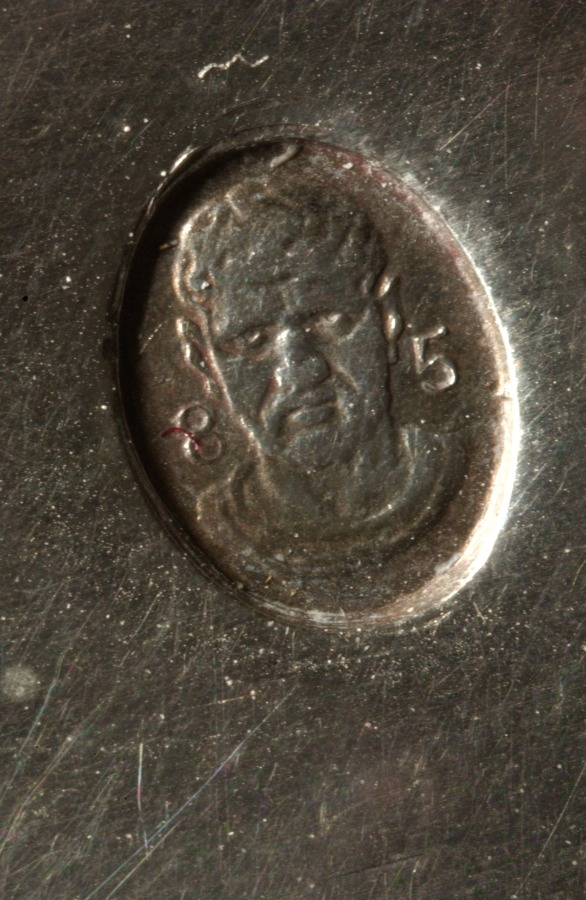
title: Covered Tureen on Stand (Pot à oille)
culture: France, late 18th-early 19th Century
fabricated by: Henry Auguste (French, 1759–1816)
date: 1797–98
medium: silver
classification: Silver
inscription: [Coat-of-arms of Amoral don Federico Carlos Gravina on bowl; cover; stand]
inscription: [Assay mark for large-sized work, 1798-1809, lining exterior; tureen foot exterior]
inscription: [Assay mark for medium-sized work, 1798-1809, beneath stand foot; on edge of cover]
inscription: [Maker's mark of Henri Auguste, master silversmith in 1785, beneath tureen foot; beneath stand foot; inside stand foot edge]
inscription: [Official assay mark for first standard silver, Paris, 1798-1809, beneath stand foot; lining exterior; on cover]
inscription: [Official mark for silver imported from countries with customs conventions, 1838-1912, beneath stand foot; edge of cover; tureen lip exterior; lining exterior; on one tureen handle; outside stand foot; tureen foot exterior]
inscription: [Unknown mark, possibly Ceres' profile in square with "E" and "7", beneath stand foot; on cover; rim of lining; tureen foot exterior; tureen lip exterior]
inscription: [Unofficial assay mark for first standard silver, Paris, 1794-1797, beneath foot stand; beneath tureen foot; near tureen handle exterior]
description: This pot-à-oille was designed by master goldsmith Henri Auguste after drawings by draftsman and sculptor Jean Guillaume Moitte. Though many of the neoclassical decorative elements on this piece are pulled from Moitte’s design, Auguste’s final product leaves out much of the proposed ornamentation. Instead this object finds distinction in its large size and smooth expanses of silver that emphasize the purity of its lines.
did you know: The coat of arms on the body of the work corresponds to the family of Federico Carlos Gravina, a Sicilian-Spanish admiral who was known to have had a close diplomatic relationship with Napoleon I.